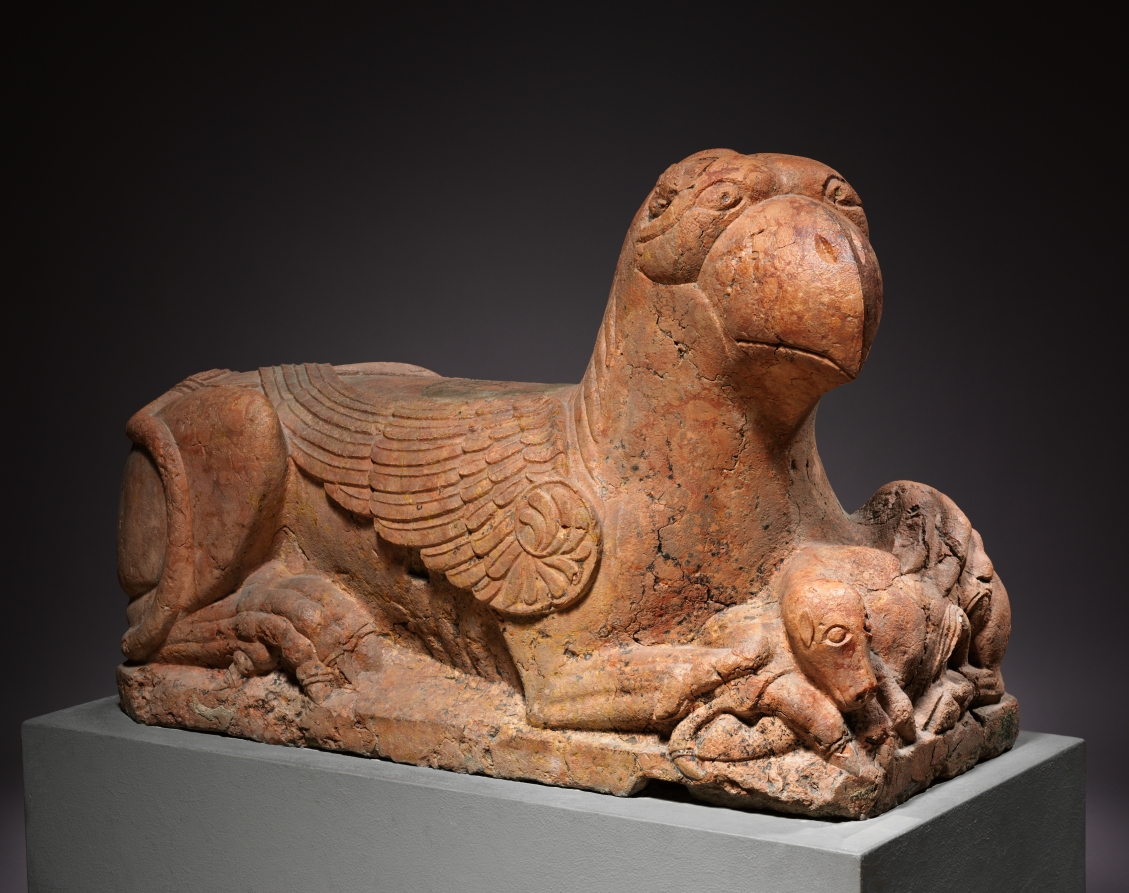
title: Guardian Griffin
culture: Northern Italy, Emilia, 12th century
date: 1150–1175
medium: pink limestone (called "Verona Marble")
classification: Sculpture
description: Griffins are fabled creatures that have the characteristics of an eagle and a lion--combining watchfulness and courage. In Christian art, the dual nature of the griffin was often used to signify that of Christ himself: divine (bird) and human (animal). Griffins were often used as guardian figures in church sculpture and were placed in portals and choir screens. The creatures seen here, with their inward-turning heads, were certainly used for such a purpose. When viewed from the front, one griffin may be seen protecting the figure of a knight between its paws, while the other griffin guards a calf. Their original function was probably to support the columns of a porch in front of a church doorway.